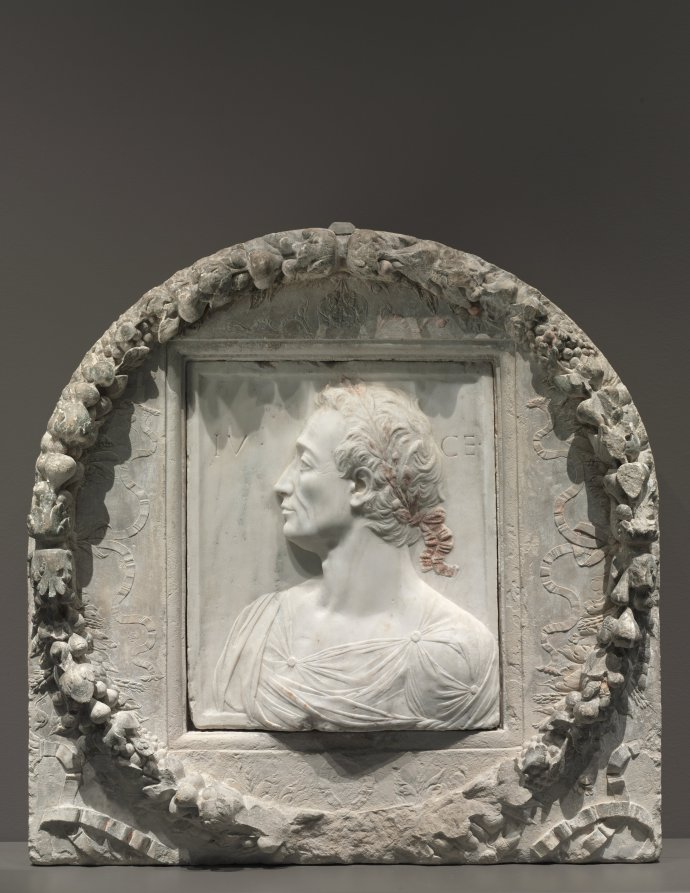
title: Julius Caesar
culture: Italy, Florence, 15th century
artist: Mino da Fiesole (Italian, c. 1430–1484)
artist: garland by Mino da Fiesole and Workshop (Italian, c. 1430–1484)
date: c. 1455–60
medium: marble with traces of bole (red clay) and limestone with traces of paint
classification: Sculpture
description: Renowned Roman general and statesman Julius Caesar (100–44 BCE) appears here as a political rather than military leader, worn by the burdens of office, with carefully described signs of aging. Mino probably used ancient coins from the collection of the Medici, Florence's ruling family, as his starting point for this sculpture. However, the complex carving, the clinging drapery, and the psychological intensity all characterize the inventiveness Renaissance artists brought to classical subject matter. In this case, Caesar offered an important model for leadership, masculinity, and composure. The garland is clearly by a different hand, but passages, such as the ribbons and flowers in low relief, correspond to details found in other decorative carvings from Mino's workshop. Initially, the limestone setting was probably put into a wall, perhaps in a lunette over the door, from which it was later removed. However, the relationship between the garland and the relief has not yet been clarified and is the subject of ongoing research.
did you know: Traces of paint on this white marble relief indicated that it was once brightly painted.